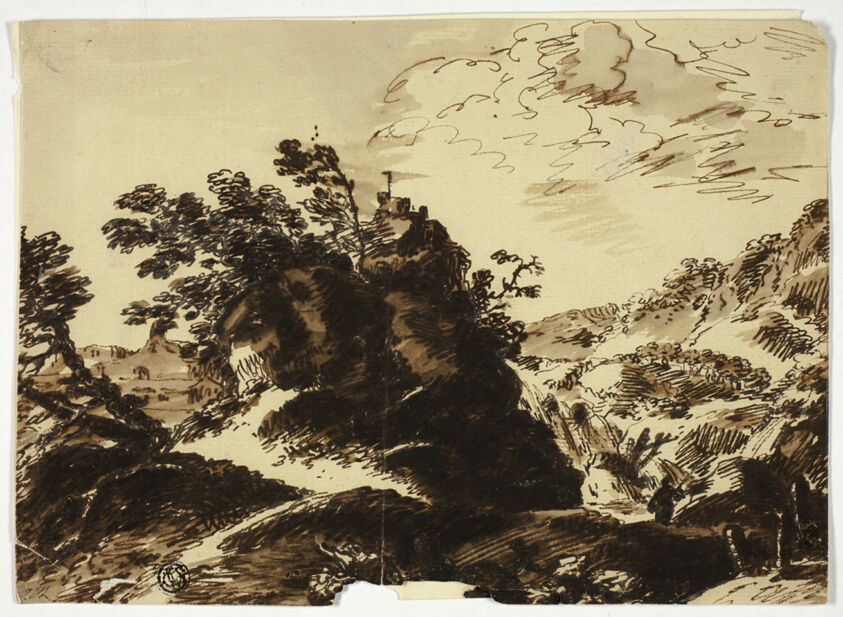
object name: Drawing and Watercolor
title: Hilly Landscape with Figure in Foreground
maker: Unknown Artist; German or Italian, n.d.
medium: Pen and brown ink, with brush and brown wash, on tan laid paper, tipped on cream wove paper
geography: Germany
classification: pen and ink drawings; drawings (visual works); prints and drawing